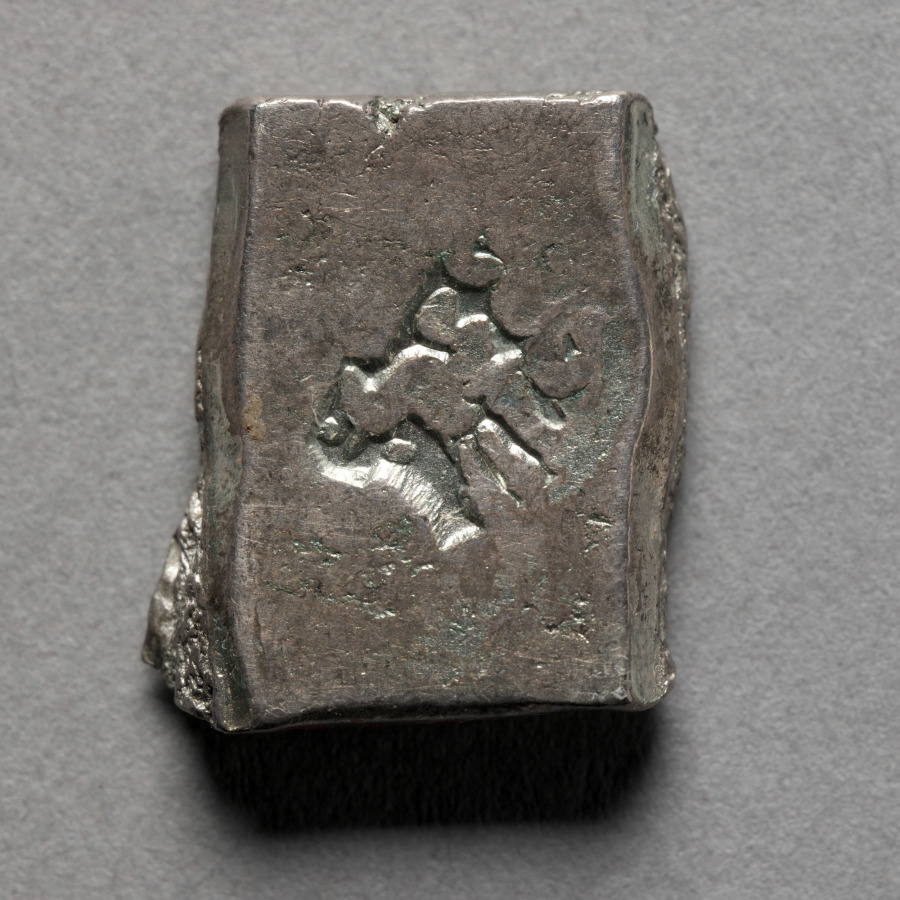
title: Punch-Marked Coin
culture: India, Rajasthan, Maurya period (322–185 BCE)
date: 400–300 BCE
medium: silver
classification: Coins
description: Indigenous Indian coinage was cut to weight from sheets of silver or copper and punch-marked, instead of die-cast. Each punch-marked coin had a unique combination of symbols.